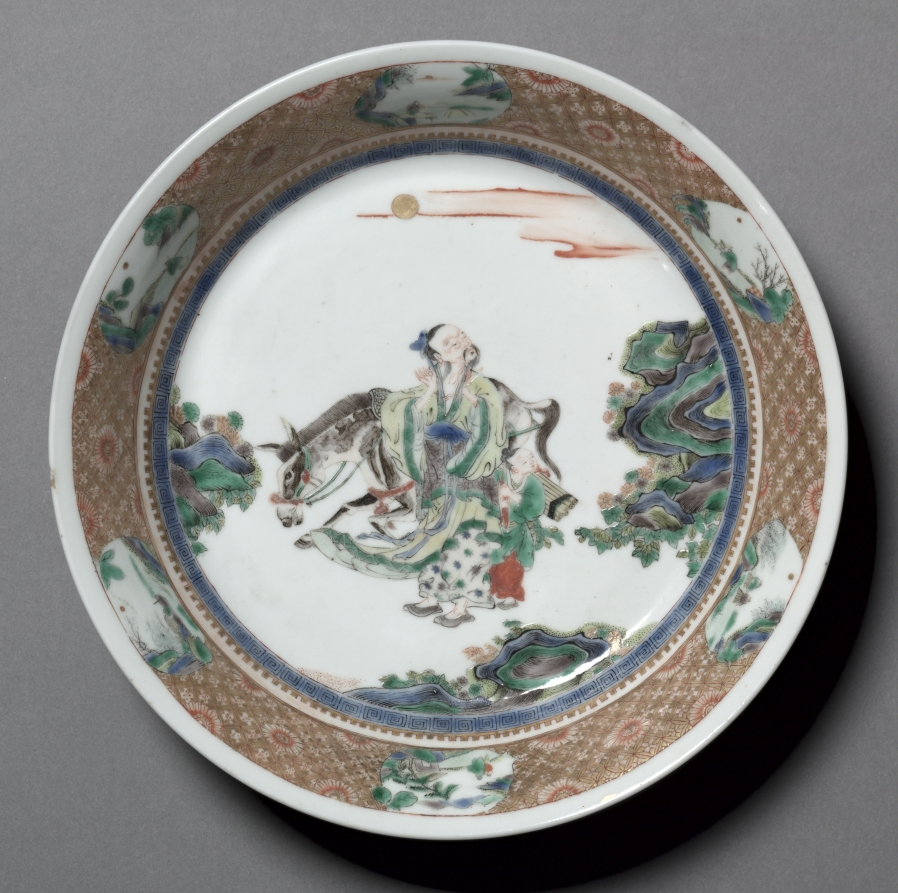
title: Dish with Zhang Guolao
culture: China, Jiangxi province, Jingdezhen kilns, Qing dynasty (1644-1911), Kangxi reign (1662-1722)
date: 1662–1722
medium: porcelain with famille verte overglaze enamel and painted gold decoration (interior) and powder blue glaze with painted decoration (exterior)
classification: Ceramic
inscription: 大清康熙年製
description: Zhang Guolao, featured on this dish, is one of the Eight Immortals and a gifted magician who was believed to know the secret arts to obtain longevity. Typically depicted as an old man and accompanied by his mule, he is the patron saint of artists. His mule is said to be magical; it can be folded up like a piece of paper to fit into a small bag. The central scene is framed by a sumptuously gold-decorated rim showing spaces reserved for landscape scenes in primarily fresh blue and green colors.